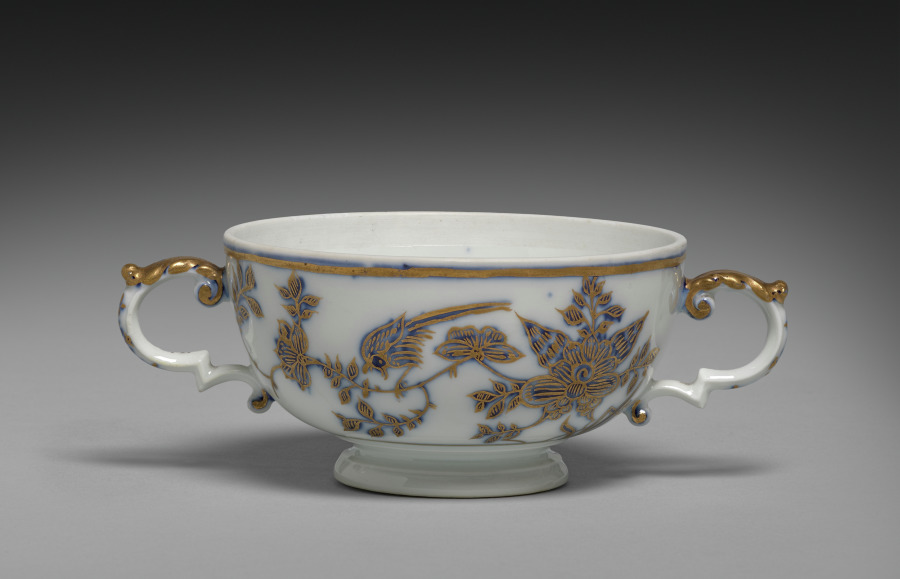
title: Broth Bowl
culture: Germany, Meissen, 18th century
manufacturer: Meissen Porcelain Factory (German, est. c. 1710)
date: 1730–40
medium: gilt porcelain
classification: Ceramic